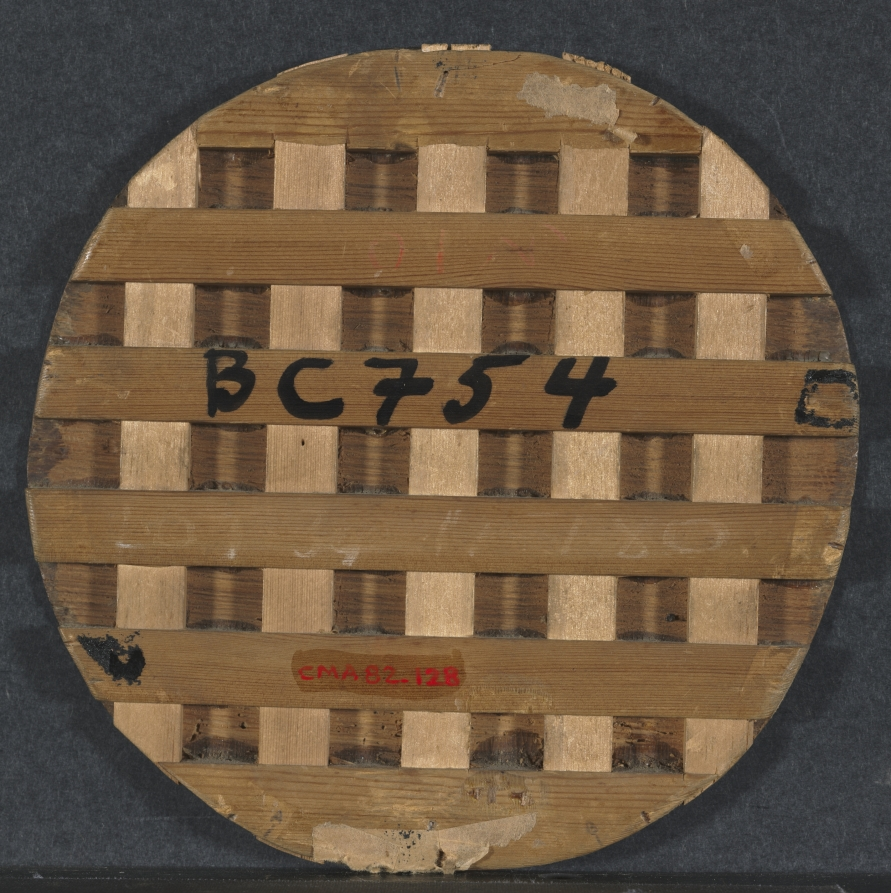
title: Travelers by a Lake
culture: Netherlands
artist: Esaias van de Velde (Dutch, 1587–1630)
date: 1625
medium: oil on wood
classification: Painting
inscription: signed lower center: E.V. Velde. / 1625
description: Prior to the early 1600s, Dutch artists typically painted landscapes as idealized or artificial backdrops to decorate the more important religious or mythological narratives they included. A revolution in landscape painting occurred in Haarlem in the 1610s when artists like Esaias van de Velde started to paint the humble and everyday subjects of the land and people of the Netherlands in convincingly naturalistic detail. The river view was a subject that van de Velde developed in the 1620s. While the water is subordinate to the other elements, its stillness reinforces the serenity of the environment, as do the figures and ruins that exist in in harmony with the natural world. Although van de Velde would have made sketches outdoors, the painting itself was not a copy of these sketches. Rather, as was the common practice, van de Velde would carefully construct paintings in his studio, using a combination of sketches and memories as his inspiration. For its owner, this picture would have satisfied an urban patron's nostalgia for the humble countryside, particularly in light of the rapid urbanization of Dutch society after their independence from Spain in 1609.